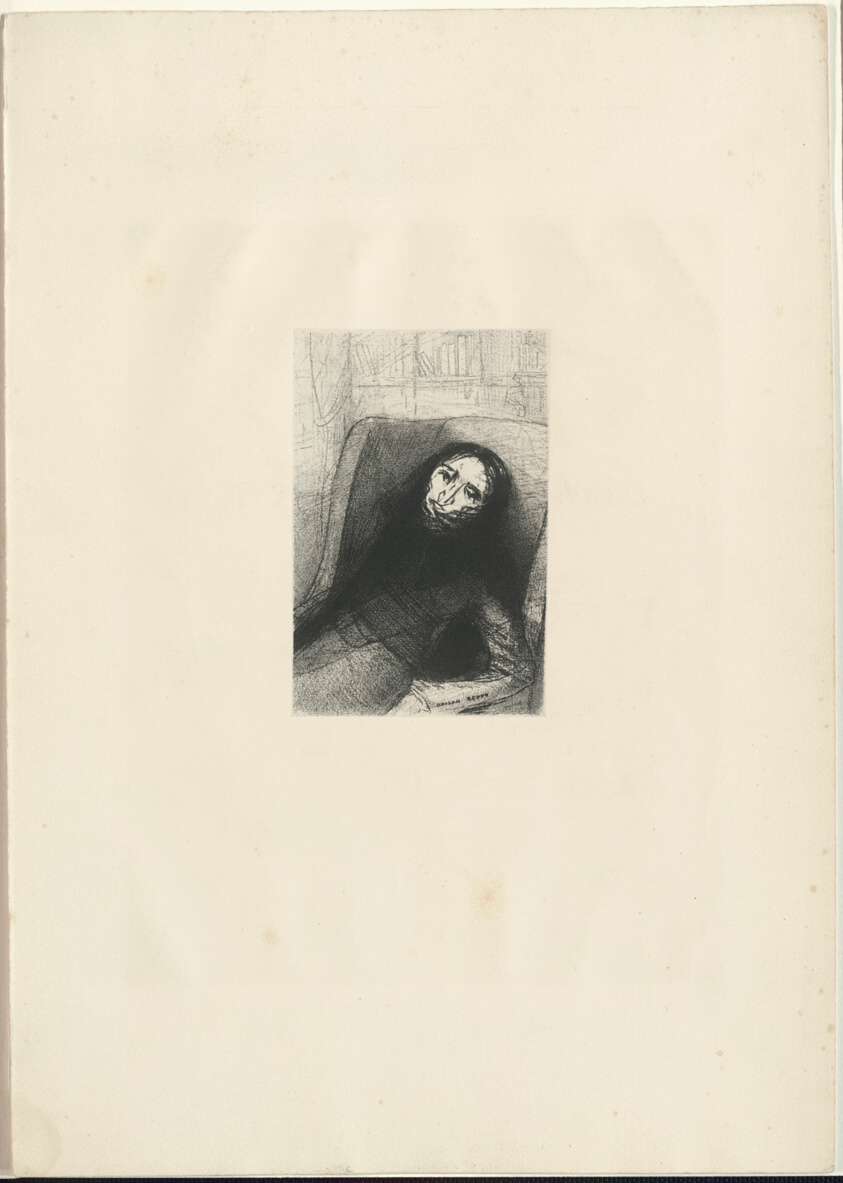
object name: Print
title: Des Esseintes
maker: Odilon Redon (French, 1840-1916); written by Joris-Karl Huysmans (French, 1848-1907)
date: 1888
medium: Lithograph on chine laid down on cream wove paper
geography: France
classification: lithograph; print; prints and drawing; paper